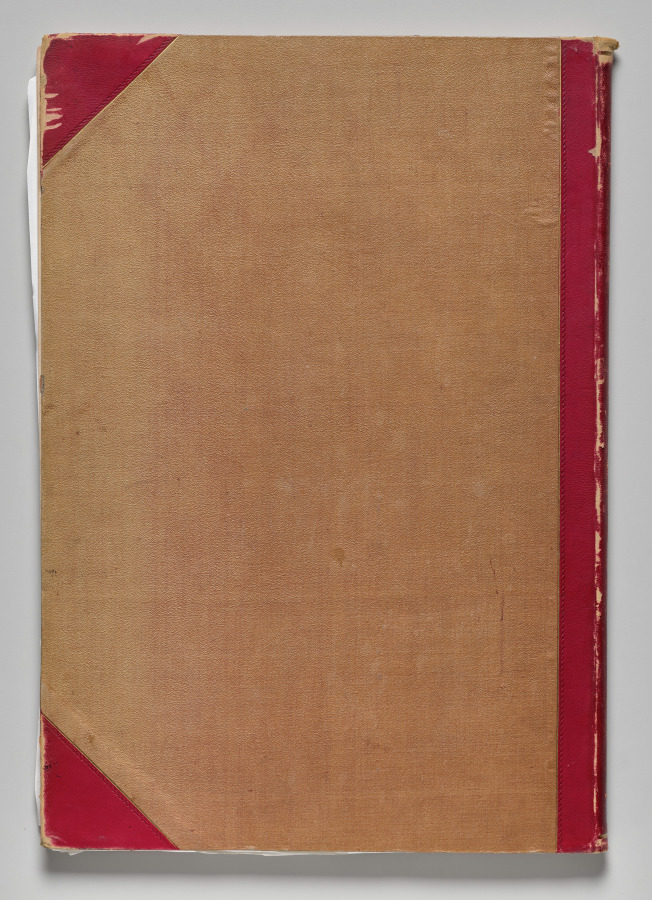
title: Picturesque Architecture in Paris, Ghent, Antwerp, Rouen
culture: England, 19th century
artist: Thomas Shotter Boys (British, 1803–1874)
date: 1839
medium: lithograph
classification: Portfolio